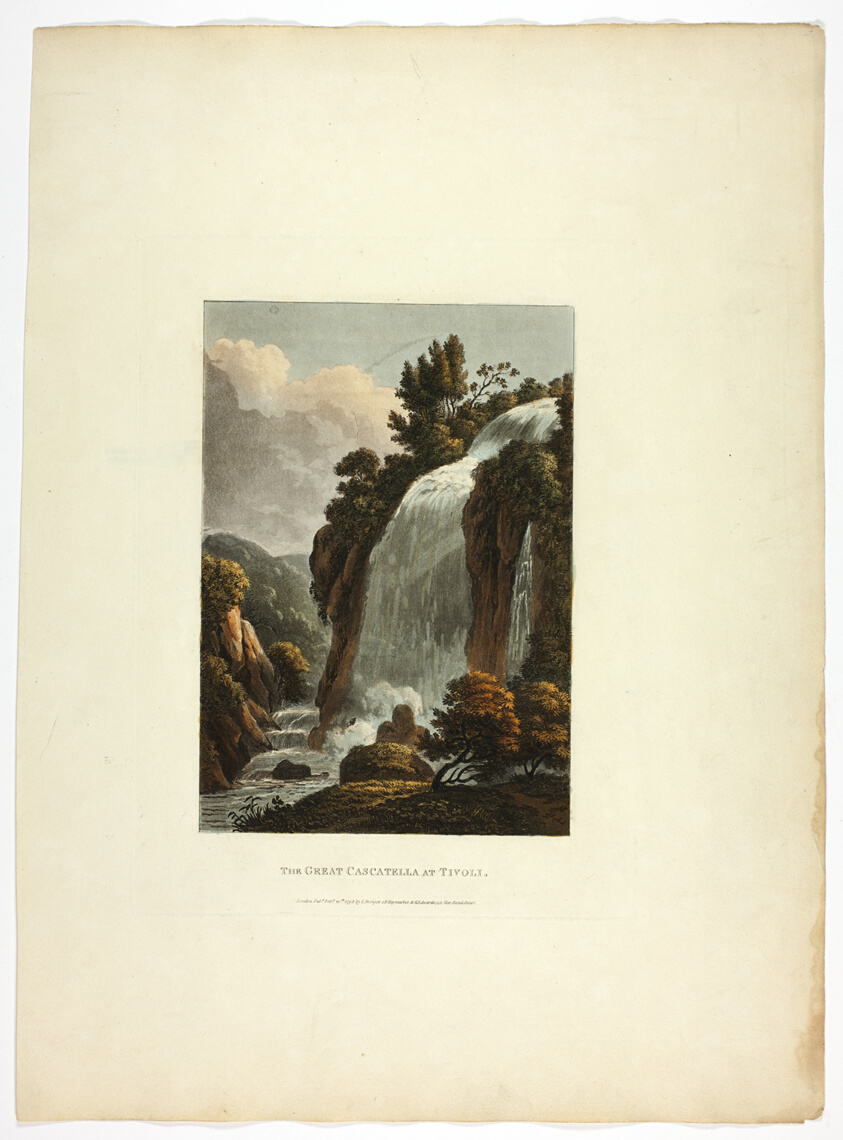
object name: Print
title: The Great Cascatella at Tivoli, plate thirteen from the Ruins of Rome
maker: M. Dubourg, (English, active 1786-1838); published by J. Merigot (Italian, Unknown)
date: published February 20, 1798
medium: Hand-colored aquatint on paper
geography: England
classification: aquatint; print; prints and drawing